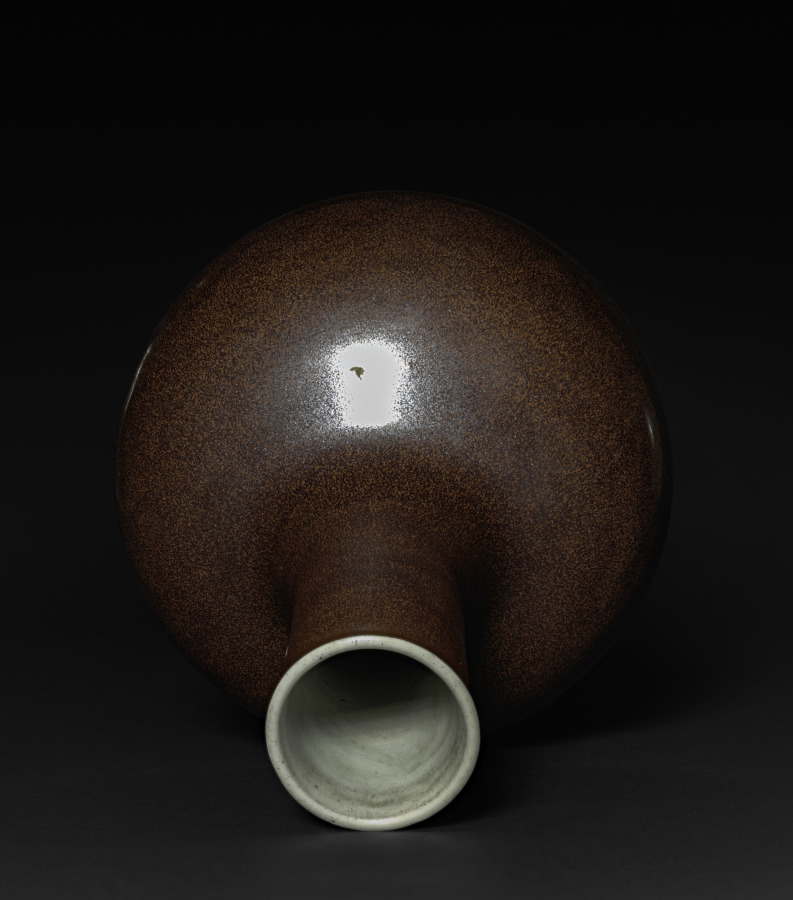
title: Vase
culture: China, Qing dynasty (1644–1911), Qianlong reign (1736–95)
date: 1736–95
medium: porcelain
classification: Ceramic